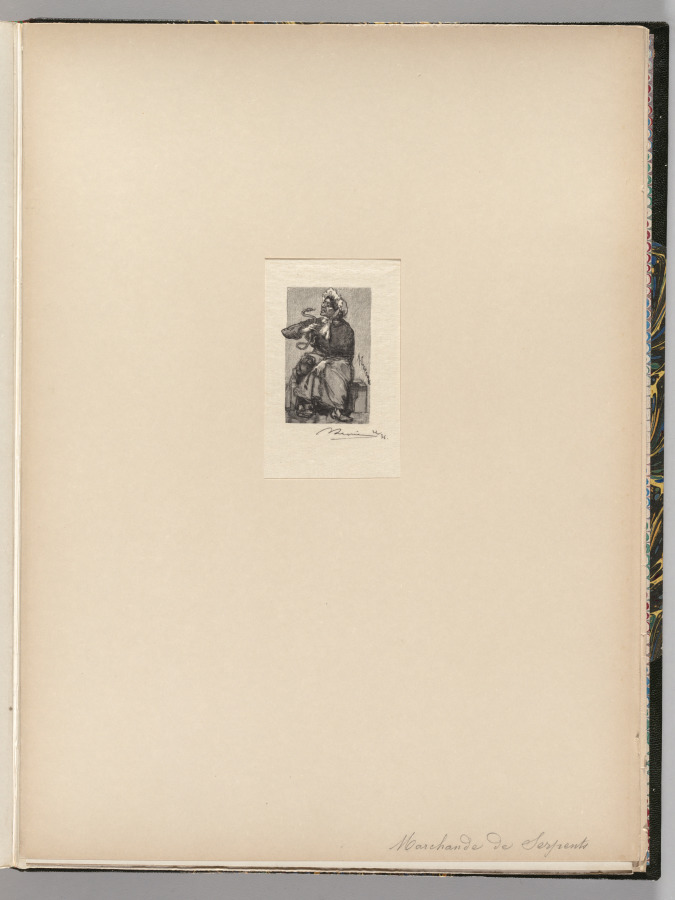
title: Fontainebleau Forest: Serpent Merchant (La Forêt de Fontainebleau: Marchande de Serpents)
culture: France, 19th century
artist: Auguste Louis Lepère (French, 1849–1918)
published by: A. Desmoulins, Published in Revue Illustrée, 1887–90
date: 1890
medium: wood engraving from bound volume of 34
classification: Bound Volume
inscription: On block, right center: A LEPERE; below image, lower right, in black ink: ALepère 22/35; on window mat, lower right, in graphite: Marchande de Serpents